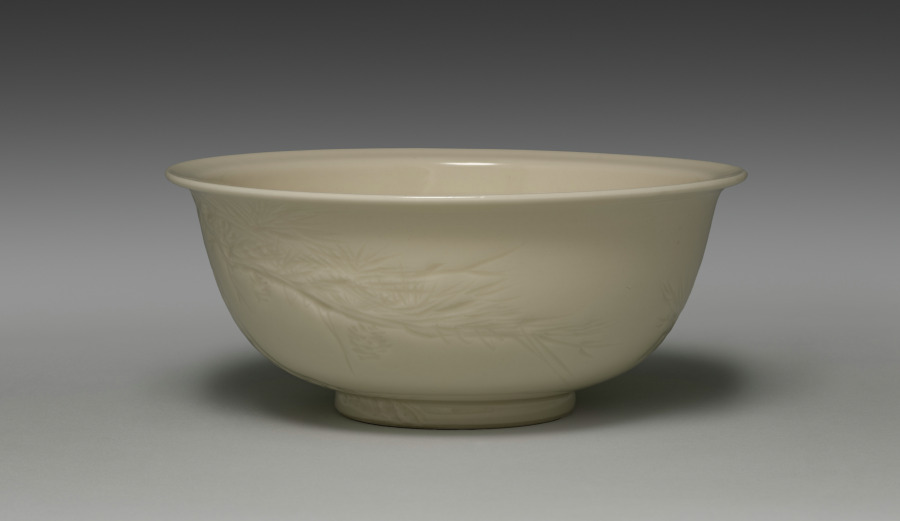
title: Bowl with Old Pine and Poem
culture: Japan, Taishō period (1912–26) or Shōwa period (1926–89)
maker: Seifū Yohei IV (Japanese, 1872–1951)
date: 1914–46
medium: Porcelain with molded and carved design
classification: Ceramic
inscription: 鶴樹君子風拂太平枝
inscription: 清風造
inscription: 清風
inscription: 成山清風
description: A grand, aged pine is carved into the body of this bowl. The inscription on the reverse side explains the tree’s presence. It is an altered version of two lines from a poem by Li Jiao (646?–715?) called “Pine.” Li Jiao was a senior government official who had a tumultuous career under the reign of Wu Zetian (r. 690–705), as well as those of her sons and grandson during the Tang dynasty (618–907). Although little known today, his work was read in Japan during the Heian (794–1185) and Kamakura periods (1185–1333). An anthology containing his poems, which was lost in China, was passed down across the generations in Japan. The translation of the inscription is as follows (the original characters, written and read from right to left, are shown below from left to right): The crane nests in the mastwood tree, the wind flicks at its peaceful branches. 鶴樹君子風拂太平枝 The mastwood is a pine-like evergreen, and the crane sheltering there is protected from the wind. In the original poem, the characters before “branches” (枝) are rather 大夫, meaning “high official.” This is likely a reference to the title bestowed upon a pine tree by the emperor Qin Shi Huang (r. 221–210 BCE) in thanks for its protection when a fierce rain fell as he ascended Mount Tai to pay his obeisance to the heavens.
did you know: The box inscription identifies the bowl's glaze as kanpakuyū, "bright-jewel white glaze."